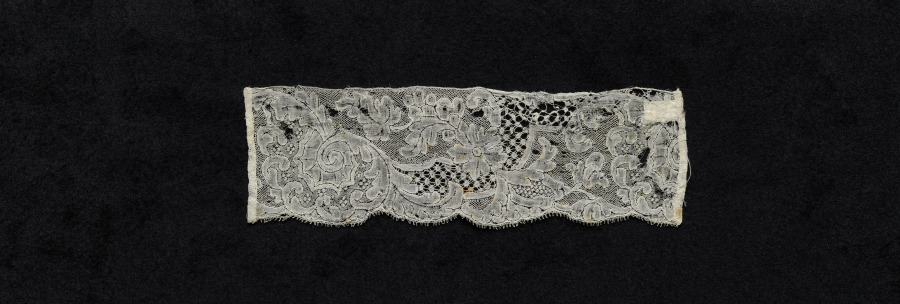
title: Lace Edging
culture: Belgium, Mechelen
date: 1700s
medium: Linen: bobbin lace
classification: Lace